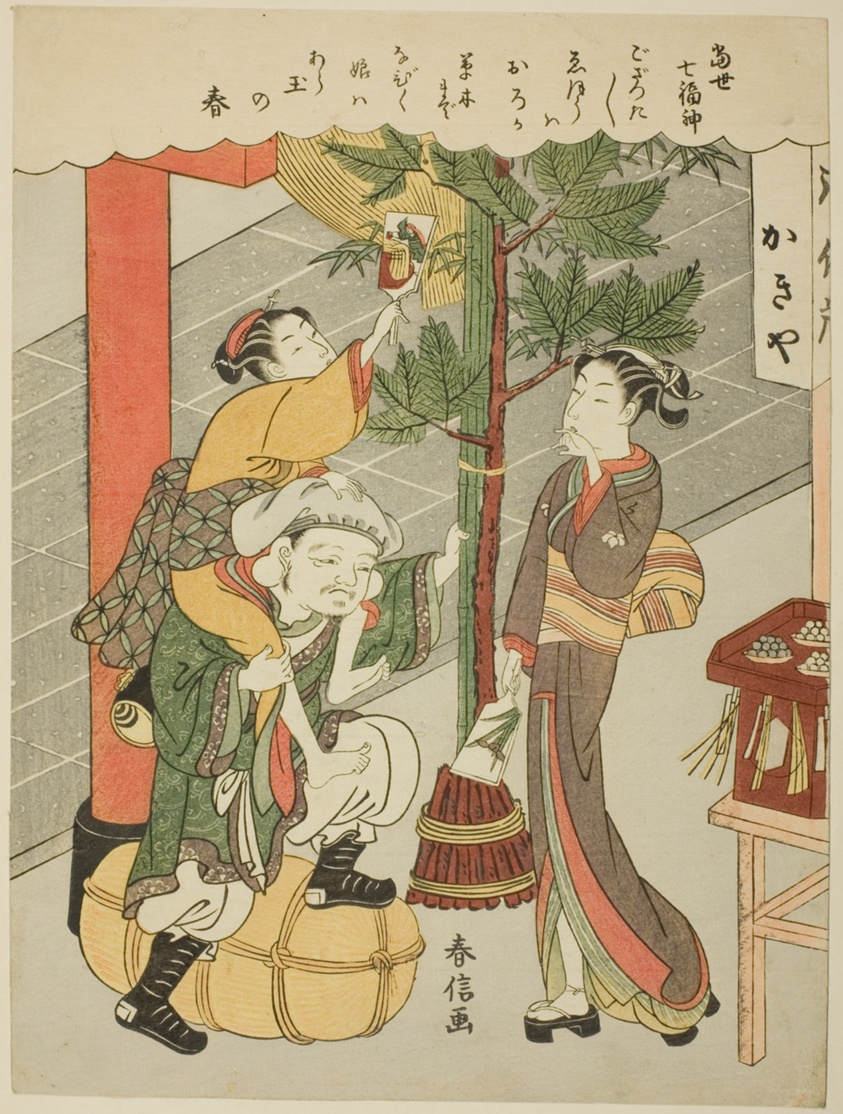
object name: Print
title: Daikokuten, from the series "The Seven Gods of Good Luck in Modern Life (Tosei Shichi Fukujin)"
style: Japanese (culture or style)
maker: Suzuki Harunobu 鈴木 春信; Japanese, 1725 (?)-1770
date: c. 1769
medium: Color woodblock print; chuban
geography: Japan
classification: woodblock print; print; asian art